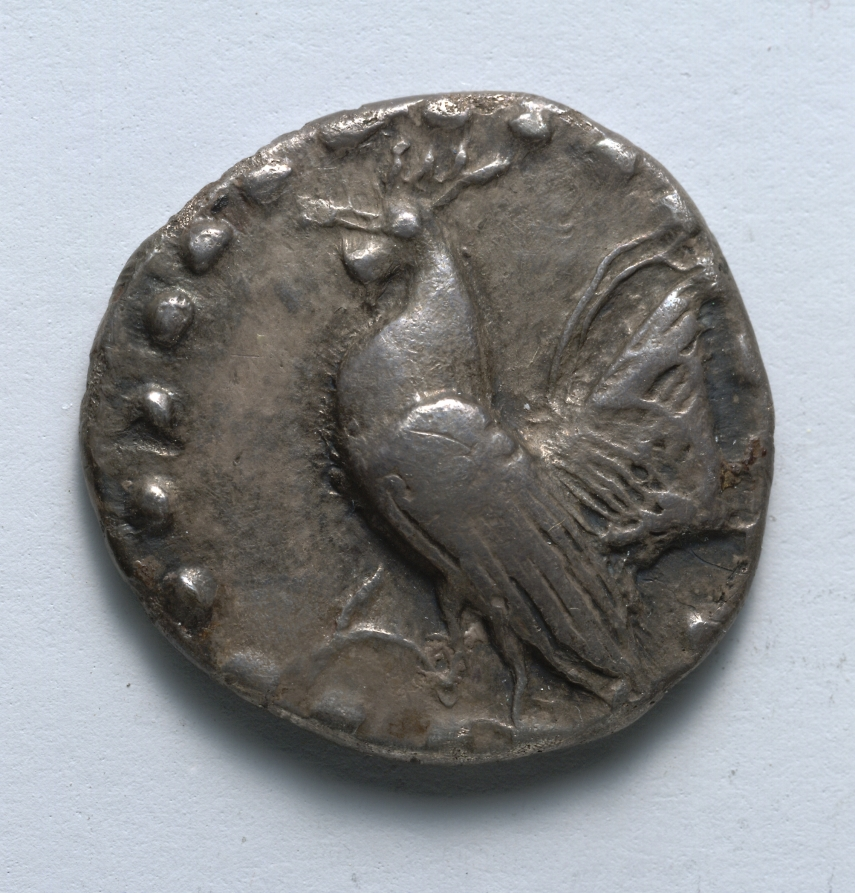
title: Drachm: Rooster (obverse)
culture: Greek, minted at Himera (Sicily)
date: c. 530–483 BCE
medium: silver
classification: Coins